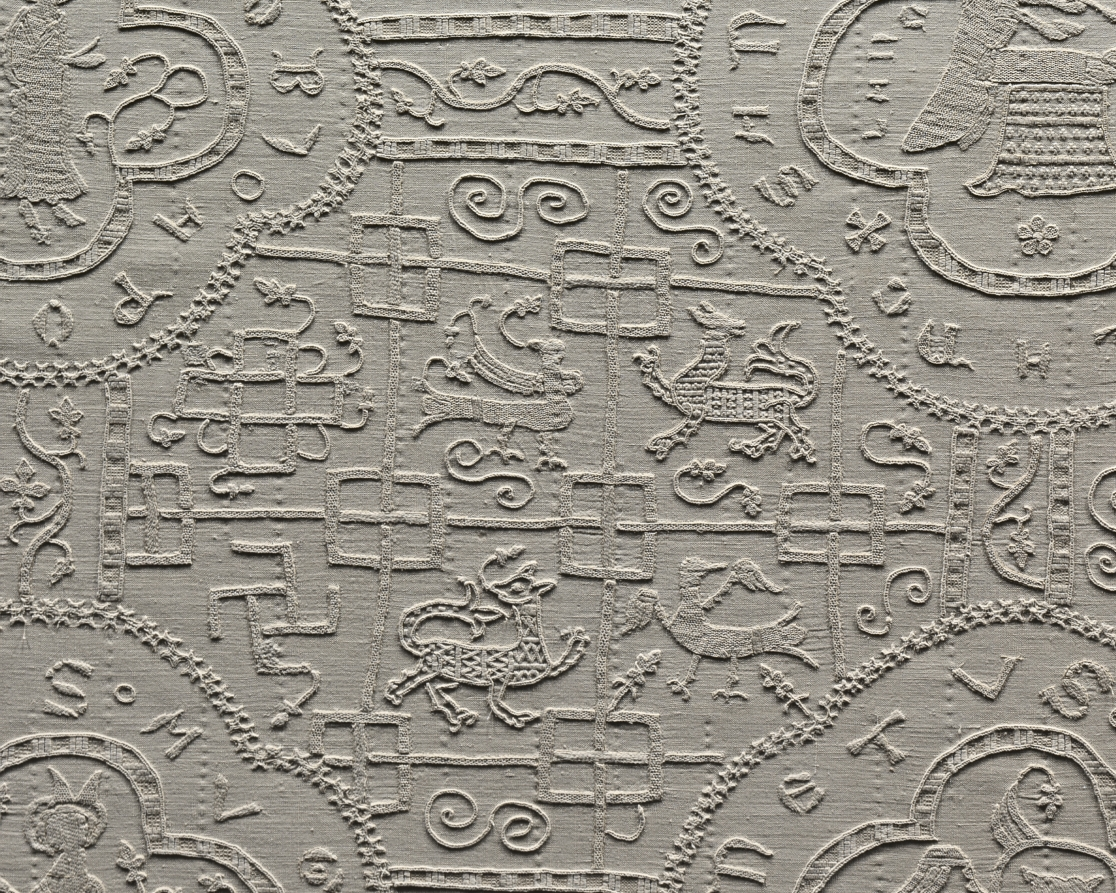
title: Altar Cloth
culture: Germany, Altenberg on the Lahn, Premonstratensian Convent, 14th century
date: c. 1350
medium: embroidery: linen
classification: Embroidery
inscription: various motifs enclosed in quatrefoils with identifying inscriptions in Gothic letters.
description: This large, embroidered altar cloth is one of the rarest, most important medieval church furnishings in existence. It was stitched by nuns in the Premonstratensian Convent in Altenberg on the Lahn River, north of Frankfurt, Germany, and was used to cover the church’s high altar in the weeks leading up to Easter. The cloth is an example of linen embroidery, a specialty of German nuns in the later Middle Ages. The Altenberg monastery church once had valuable furnishings; the high altar retable (a decorated frame with sculptures and paintings on the top of an altar) has survived, the main parts of which are now in the Städel Museum in Frankfurt, Germany.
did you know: When lit from behind, the previously hidden details emerge and the complex design becomes evident.